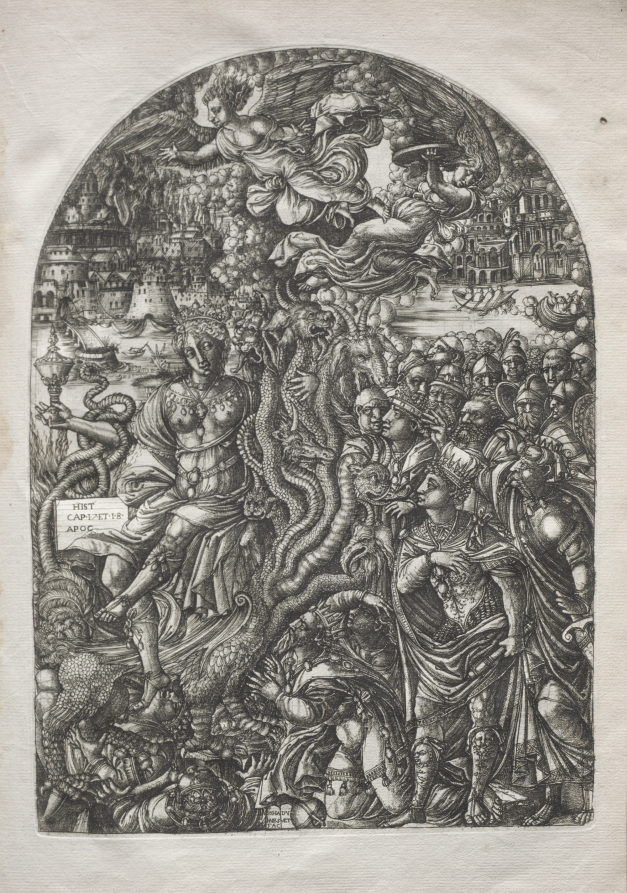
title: The Apocalypse: Babylon the Harlot, Seated on the Seven-headed Beast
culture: France, 16th century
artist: Jean Duvet (French, 1485–1561)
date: 1546–1556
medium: engraving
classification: Print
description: This print is part of a bound volume of works illustrating the a narrative of the Apocalypse, taken from the Revelation of Saint John in the Bible. The 23 engravings in the series occupied the artist for a number of years and represent his greatest artistic achievement. The museum's volume is one of only seven known complete sets. Jean Duvet was one of the first major printmakers in France and one of the most original artists of the 1500s. Although he worked mostly in the provincial city of Langres, he became aware of Italian art through the circulation of prints—notably those of Marcantonio Raimondi. His solidly modeled human figures reflect the influence of the Italian High Renaissance. Duvet, however, developed an idiosyncratic, highly artificial style with crowded compositions that ignore rational space in favor of ornamental surface patterns.